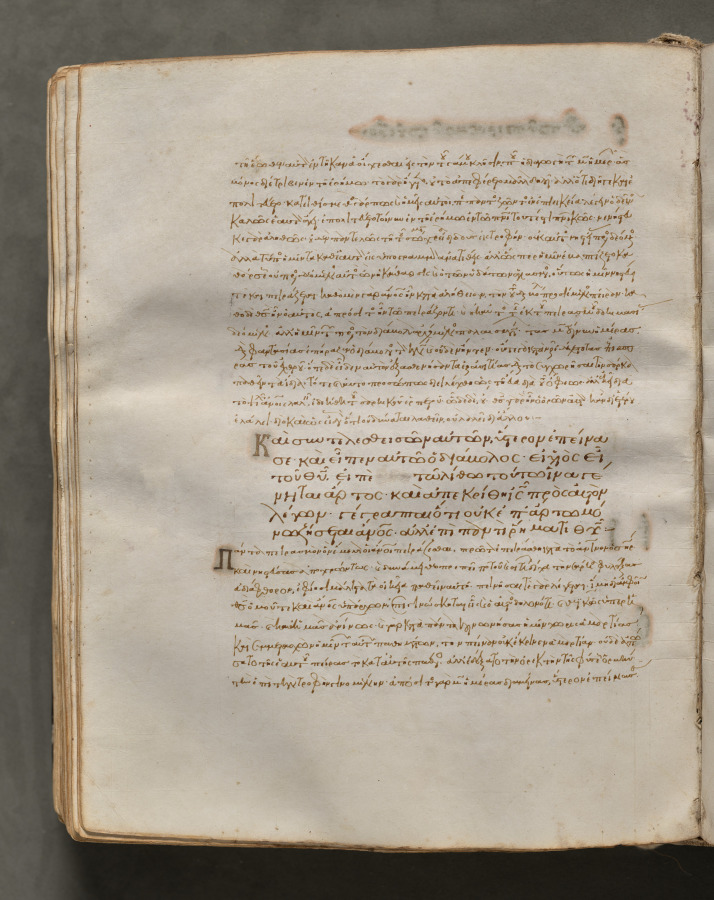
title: Text, folio 217 (verso), from a Gospel Book with Commentaries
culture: Byzantium, Constantinople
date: c. 1000–1100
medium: ink, tempera, and gold on vellum; leather binding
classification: Bound Volume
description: Each of the four gospels in this book opens on a page with brilliantly illuminated borders depicting the author of the text as well as birds-principally peacocks, symbols of the immortality of the soul-and fountains, representing the fountain of life and the salvation of the soul. This volume consists of 428 leaves with texts in Greek. Its level of sophistication suggests that it was probably written and decorated in a monastery in Constantinople.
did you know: Gospel Books were carried in procession through Byzantine churches.